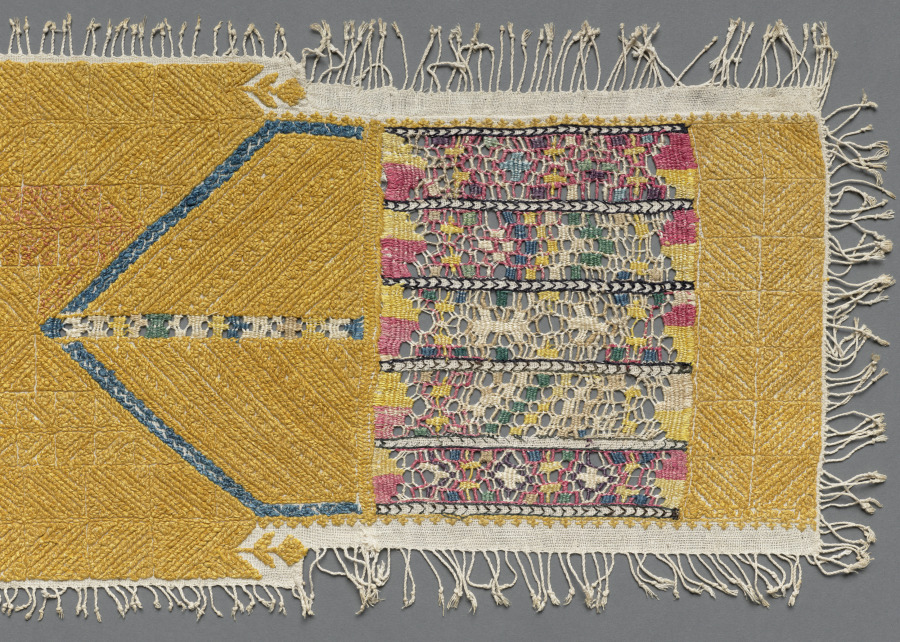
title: Furnishing textile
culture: Africa, North Africa, Morocco, Chefchaouen, Moroccan embroiderer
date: 1800s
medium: Linen, silk, dye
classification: Embroidery